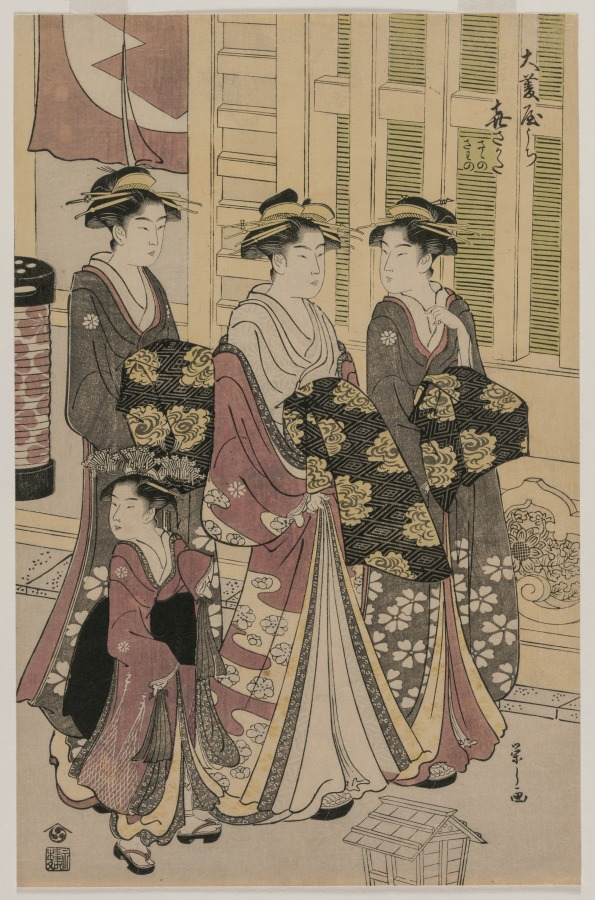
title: The Courtesan Kisagata of Ohishiya Strolling at Night with Two Shinzo and a Kamuro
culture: Japan, Edo period (1615–1868)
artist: Chōbunsai Eishi (Japanese, 1756–1829)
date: c. 1790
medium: color woodblock print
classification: Print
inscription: Signature: Eishi ga